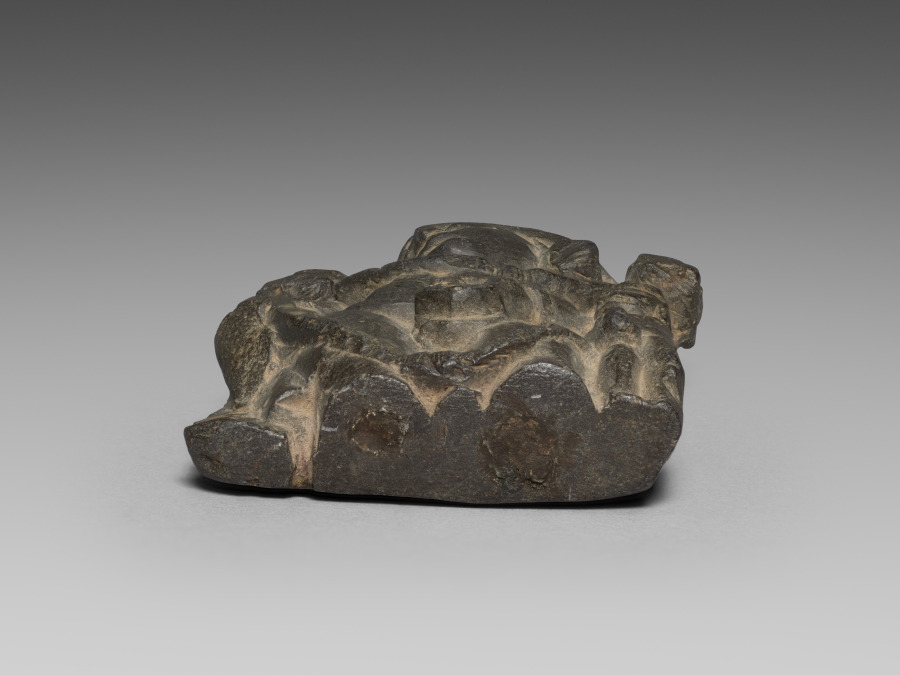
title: Male Figure, Possibly Indra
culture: Pakistan, Gandhara, possibly Swat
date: 300s–400s CE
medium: schist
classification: Sculpture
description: This carving appears to be unfinished, showing only the broad strokes of the male figure. The flat-topped crown is characteristic of Indra, which may be the identity of this figure.